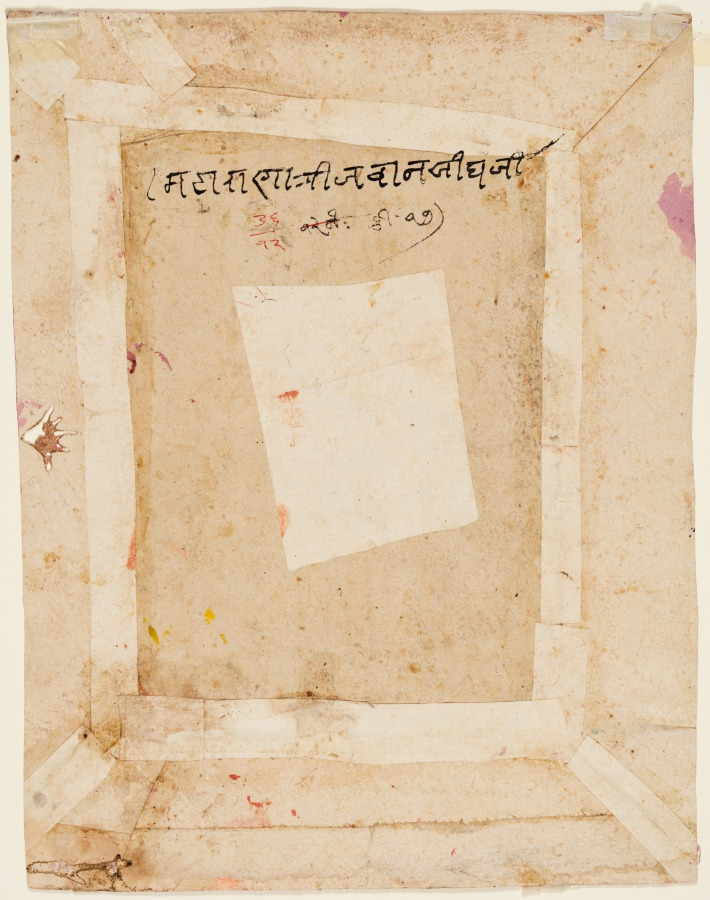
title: Maharana Jawan Singh of Mewar (r. 1828–38) Holding a Falcon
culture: Northwestern India, Rajasthan, Rajput Kingdom of Mewar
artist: possibly by Ghasi (Indian, active c. 1820–36)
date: c. 1835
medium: gum tempera, pearls, silk, and gold on paper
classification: Painting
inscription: mahārāna śrī javāna sīgha jī 36/12 ki[mat] 17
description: A profoundly bejeweled Jawan Singh, ruler of the largest Rajput kingdom, looks his hunting falcon straight in the eye. The bird also appears regal, with a gold plumed cap on the his head and a gold necklace around its neck. The multicolored poppies at his feet and the thick foliage of the trees seem to have parted in deference to his majesty, so his form can be better offset by the flat blue sky.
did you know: Actual pearls have been sewn onto the page at his belt and earrings.